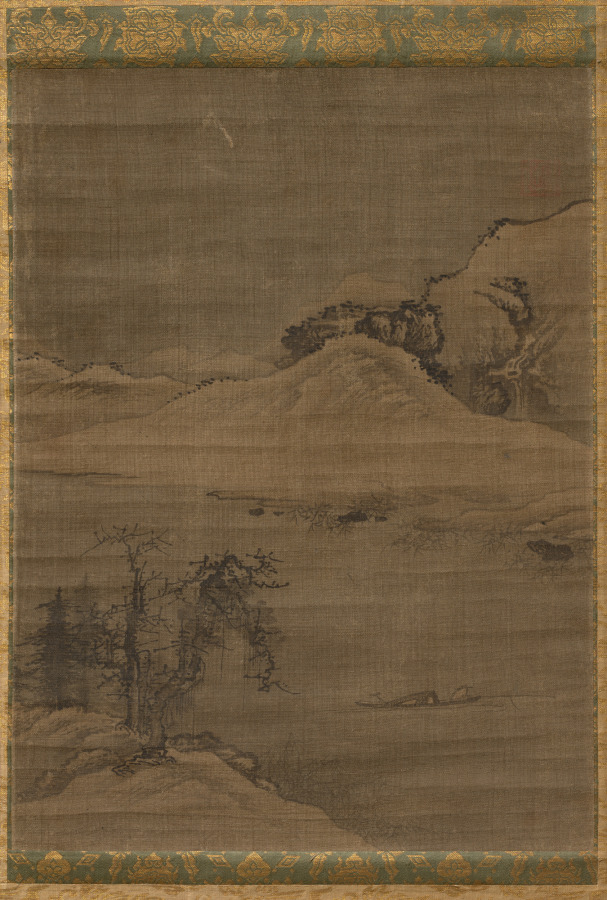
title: Landscape with Fishermen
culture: Korea, Joseon dynasty (1392–1910)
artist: attributed to Yi Bul-hae (Korean, active 1500s)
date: 1600s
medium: hanging scroll; ink and slight color on silk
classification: Painting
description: Clad in a straw rain poncho and wide-brimmed hat, a fisherman is seated in a small boat. Reeds sparkle on the far shoreline among dark, black rock forms that appear to float above the water. On the near shoreline are a pair of pines, a grove of bamboo or water reeds, and two withered deciduous trees from which moss hangs. This landscape painting, which emphasizes an intimate solitary moment through evoking various atmospheric elements—rain, evening light, and frosty air—was one of the main subjects of mid- and late 16th-century landscape paintings.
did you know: This landscape painting emphasizes an intimate solitary moment by evoking various atmospheric elements: rain, evening light, and frosty air.